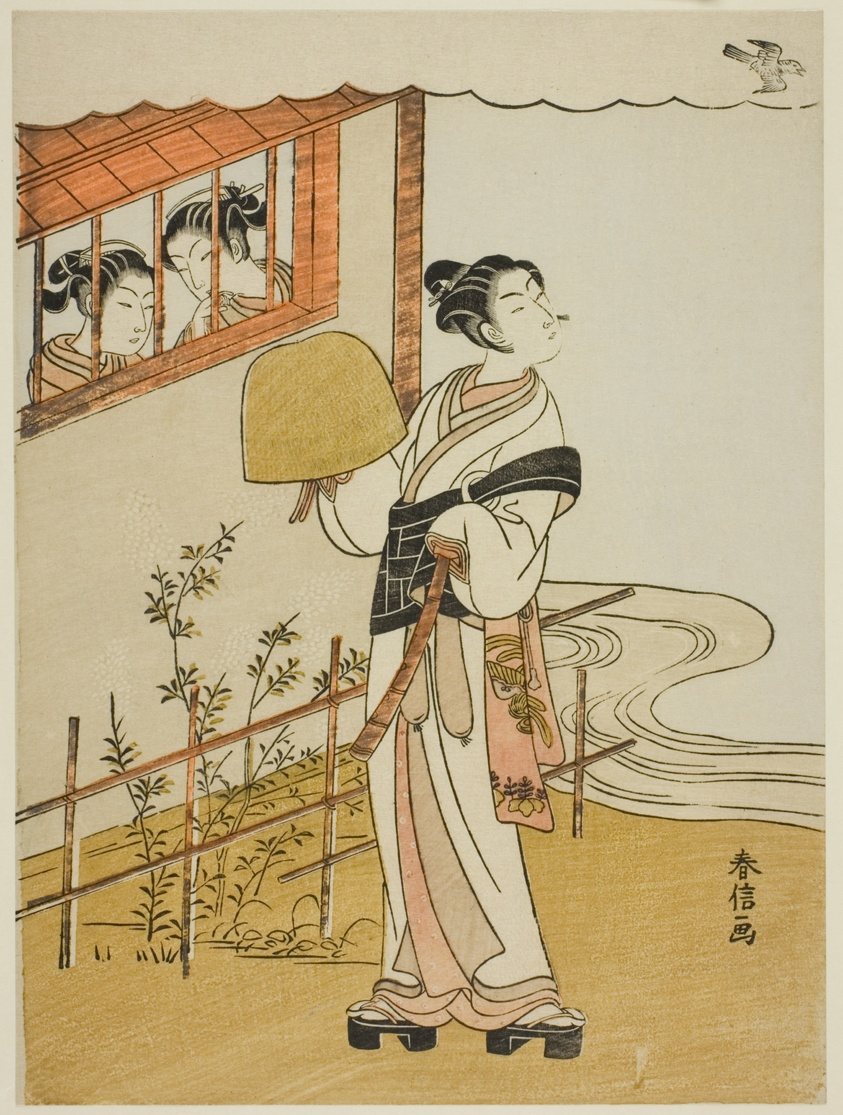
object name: Print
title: (Facsimile) The Fourth Month (Uzuki), from the series "Popular Versions of Immortal Poets in Four Seasons (Fuzoku shiki kasen)"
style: Japanese (culture or style)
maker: Suzuki Harunobu 鈴木 春信; Japanese, 1725 (?)-1770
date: c. 1768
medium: Color woodblock print; chuban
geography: Japan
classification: woodblock print; print; asian art